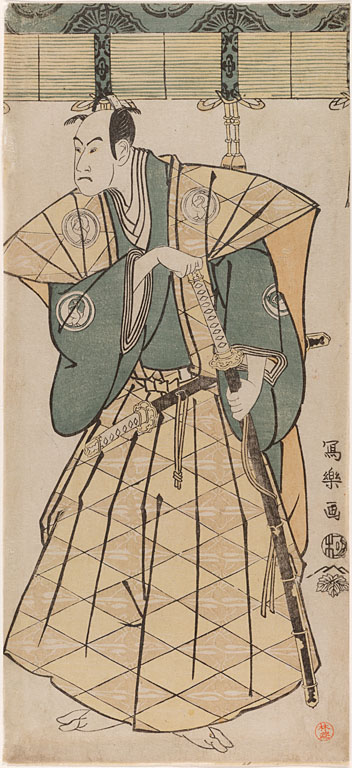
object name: Print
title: The actor Bando Hikosaburo III as Godai Saburo Chikatada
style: Japanese (culture or style)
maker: Toshusai Sharaku 東洲斎 写楽; Japanese, active 1794-95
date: 1794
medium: Color woodblock print; right sheet of hosoban triptych (center: 1928.1062, left: 2003.337)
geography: Japan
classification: woodblock print; print; asian art